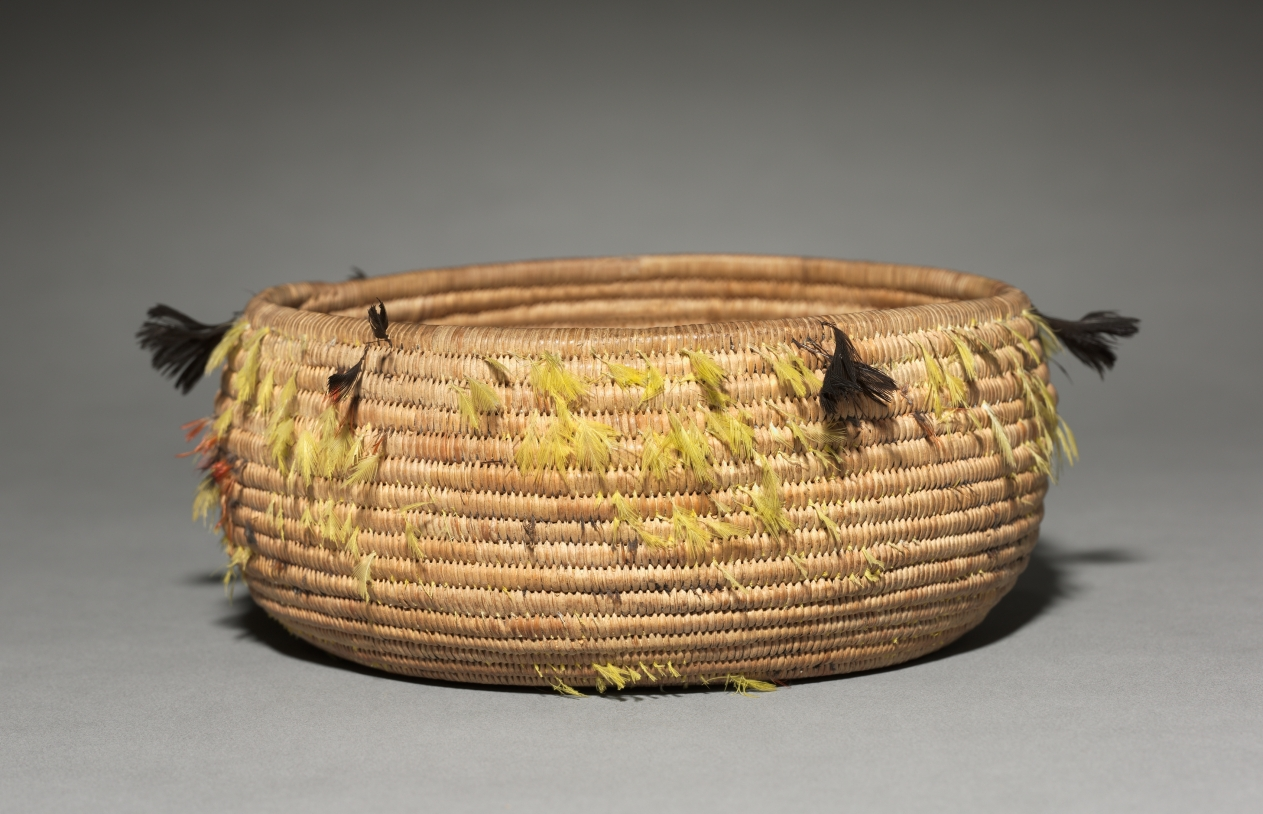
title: Gift Bowl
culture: California, Pomo, Eastern, early 20th century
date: c. 1900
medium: Sedge with Feathers; Coiled (3 rods)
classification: Basketry